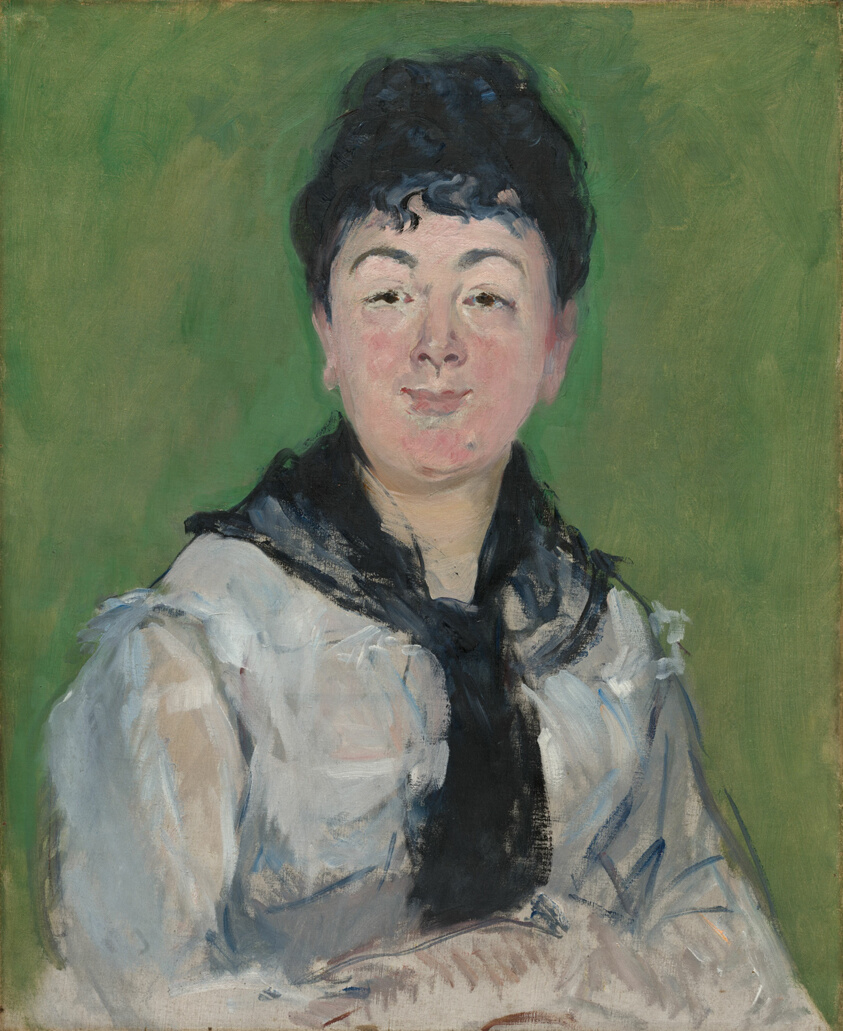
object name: Painting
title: Portrait of a Woman with a Black Fichu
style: nineteenth century, Impressionism, 19th century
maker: Édouard Manet (French, 1832–1883)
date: c. 1878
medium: Oil on canvas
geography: Paris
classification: painting; portrait; paint; oil paintings (visual works); oil on canvas; french; european painting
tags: portraits: female subject, white (color), portrait, green (color), fashion, black (color), woman, portraits